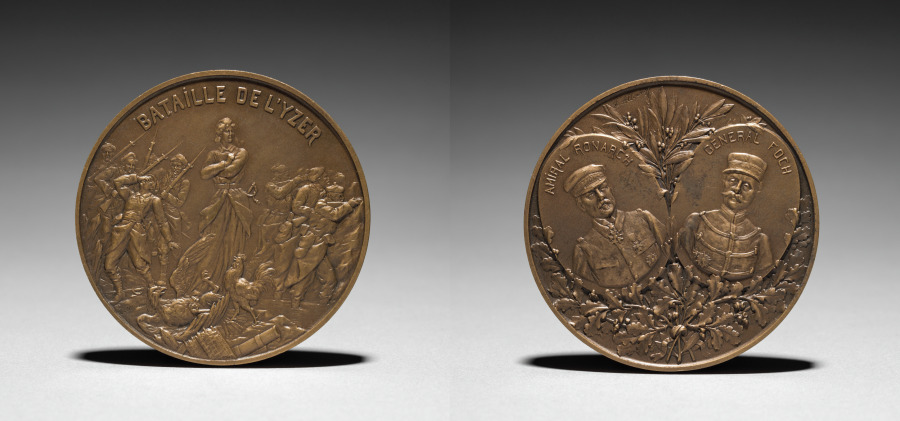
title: Medallion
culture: France, 19th-20th century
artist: Henri Emile Allouard (French, 1844–1929)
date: 1916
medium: bronze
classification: Metalwork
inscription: "Bataille de l'Yzer."